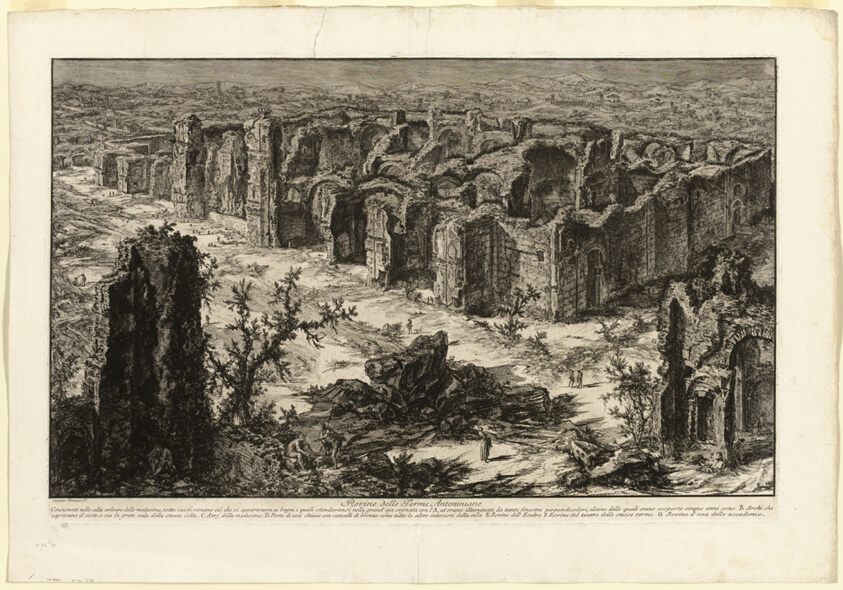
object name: Print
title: Ruins of the Antonine Baths [Baths of Caracalla], from Views of Rome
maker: Giovanni Battista Piranesi (Italian, 1720-1778); published by Francesco (Italian, 1758-1810) and Pietro Piranesi (Italian, born 1758/9)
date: 1765, published 1800–07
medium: Etching on heavy ivory laid paper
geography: Italy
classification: etching; print; prints and drawing